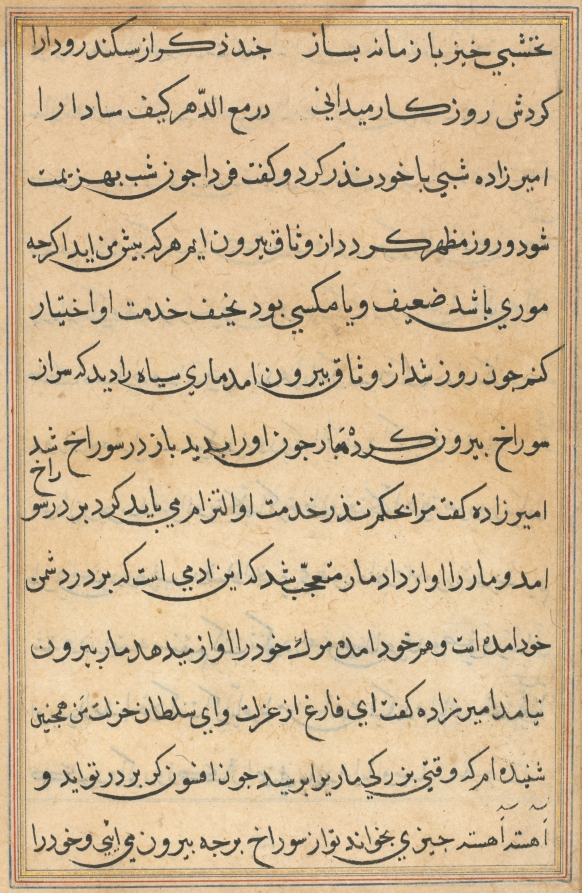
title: Page from Tales of a Parrot (Tuti-nama): text page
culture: Mughal India, court of Akbar (reigned 1556–1605)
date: c. 1560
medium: gum tempera, ink, and gold on paper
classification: Painting